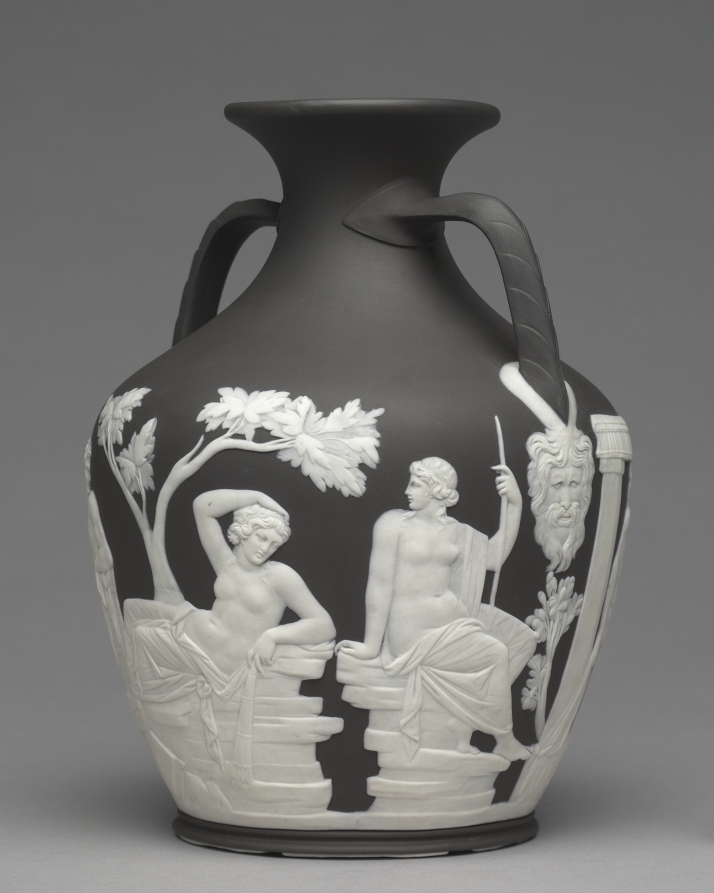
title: Portland Vase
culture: England, Staffordshire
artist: Josiah Wedgwood and Sons (Britain, Staffordshire, est. 1759)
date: c.1790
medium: jasperware with applied decoration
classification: Ceramic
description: The original Portland Vase is a Roman antiquity, made of dark-blue glass, dating from the first century AD. Such a rare archaeological find fascinated aristocratic collectors and artists alike, and eventually the vase came into the hands of the 3rd Duke of Portland in the 1780s. Around 1790 the duke lent the vase to the potter Josiah Wedgwood to make exact replicas in ceramic, of which the Cleveland example is one of the first editions. Eventually, the 4th Duke of Portland deposited the original Roman vase in the British Museum, where it resides today.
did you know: While the scene depicted here is not known for certain, many scholars believe that the Portland Vase portrays the wedding of Peleus and Thetis from Greek mythology.